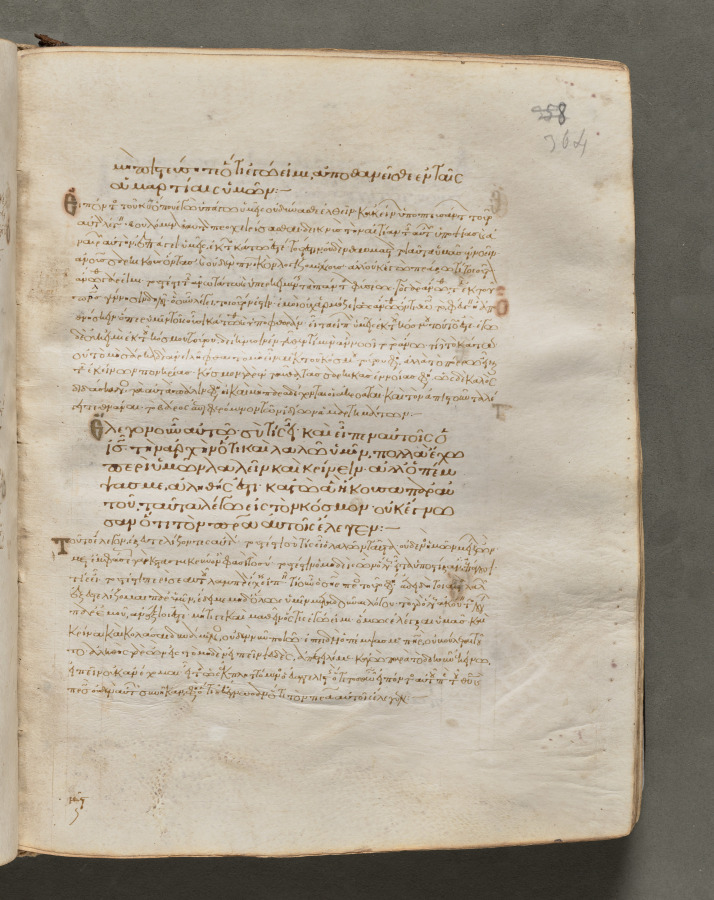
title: Text, folio 364 (recto), from a Gospel Book with Commentaries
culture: Byzantium, Constantinople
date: c. 1000–1100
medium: ink, tempera, and gold on vellum; leather binding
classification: Bound Volume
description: Each of the four gospels in this book opens on a page with brilliantly illuminated borders depicting the author of the text as well as birds—principally peacocks, symbols of the immortality of the soul—and fountains, representing the fountain of life and the salvation of the soul. This volume consists of 428 leaves with texts in Greek. Its level of sophistication suggests that it was probably written and decorated in a monastery in Constantinople.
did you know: Gospel books were carried in procession through Byzantine churches.